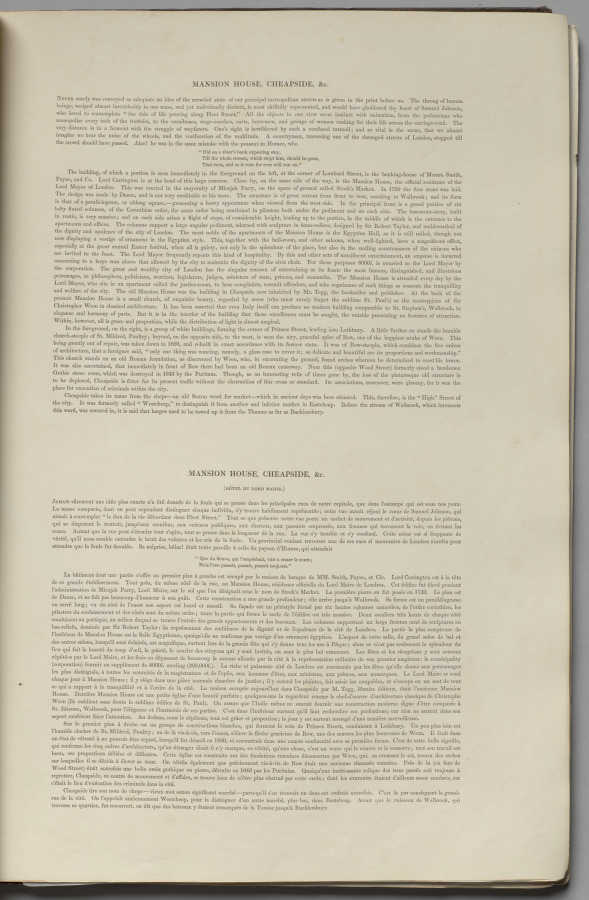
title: London As It Is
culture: England, 19th century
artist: Thomas Shotter Boys (British, 1803–1874)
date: 1842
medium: lithograph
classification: Bound Volume